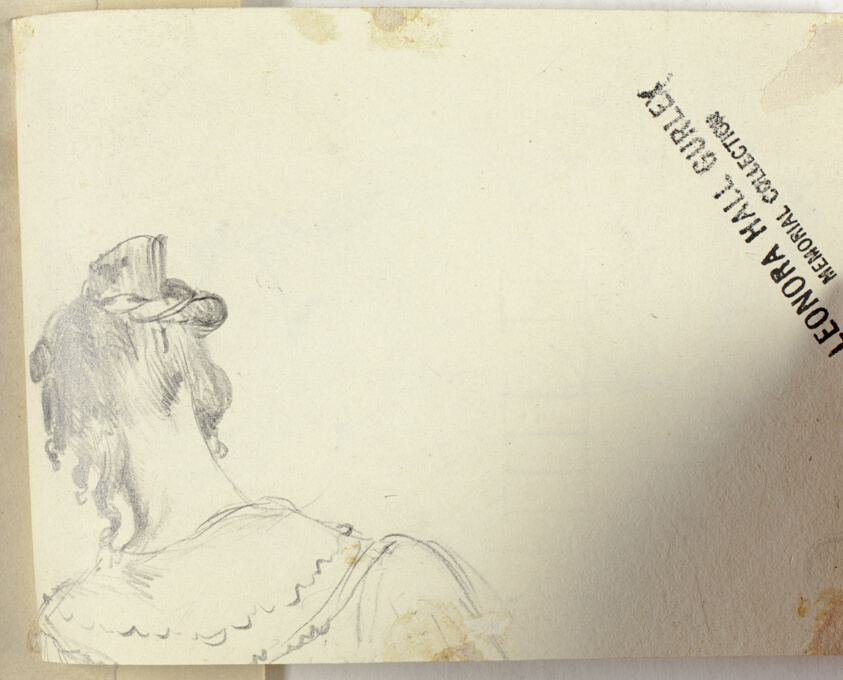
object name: Drawing and Watercolor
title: Little Girl Standing on Sofa (recto); Fragment: Back of a Woman's Head (verso)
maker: Edmund Thomas Parris (English, 1793-1873)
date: c. 1827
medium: Graphite (recto and verso) on cream wove paper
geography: England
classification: graphite; drawings (visual works); prints and drawing